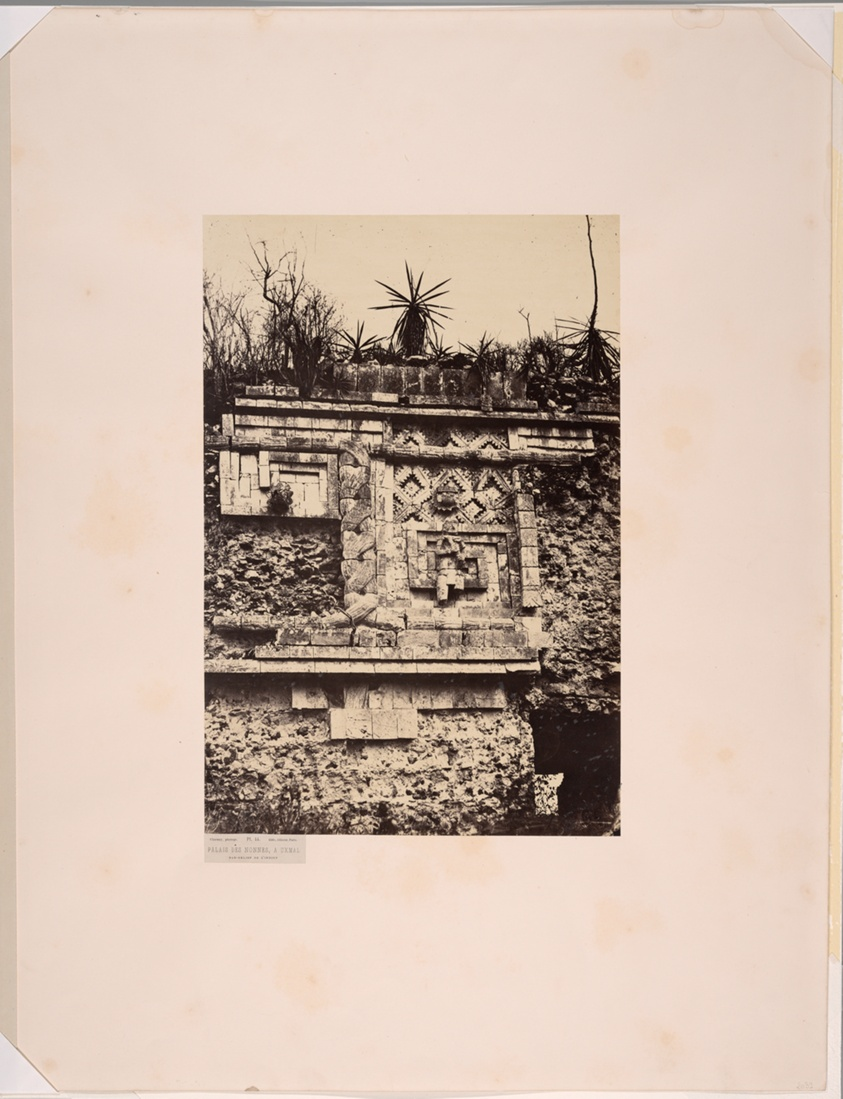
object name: Photograph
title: Uxmal, Indian Bas Relief, Nun's Palace (Uxmal, Bas Relief de l'Indien, Palais des Nonnes), plate 44 from the album "Cités et Ruines Américaines, Gide Paris" (1863)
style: 19th century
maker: Désiré Charnay; French, 1828-1915; Not printed by the artist.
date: 1860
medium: Albumen print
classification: photograph; albumen silver print; photography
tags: Paris